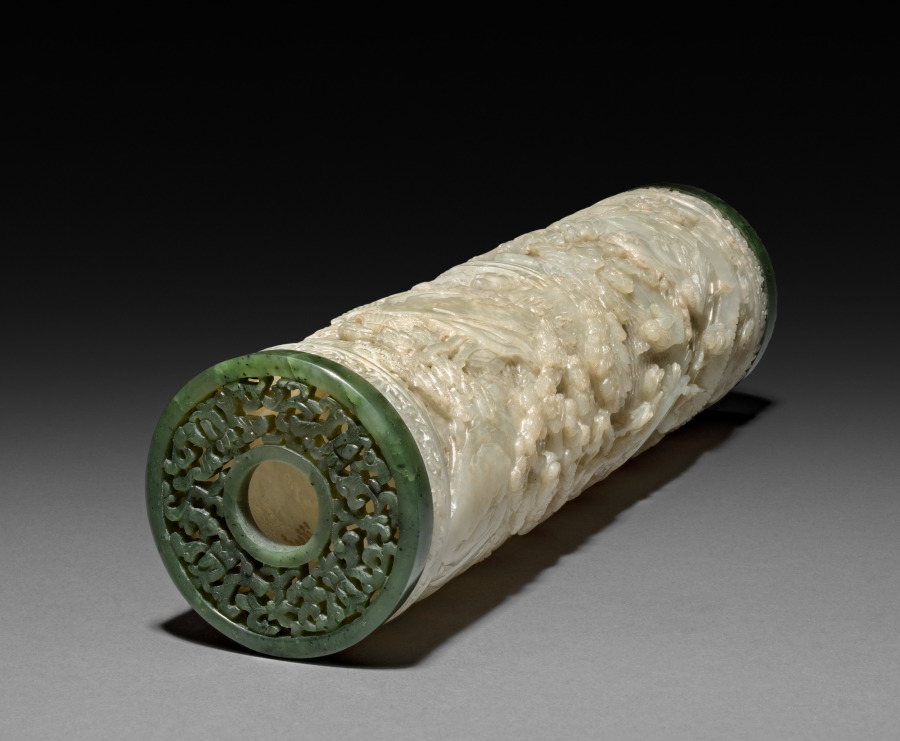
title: Cylinder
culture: China, Qing dynasty (1644-1911) or Republican period (1912-49)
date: 1800–1940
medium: jade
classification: Jade